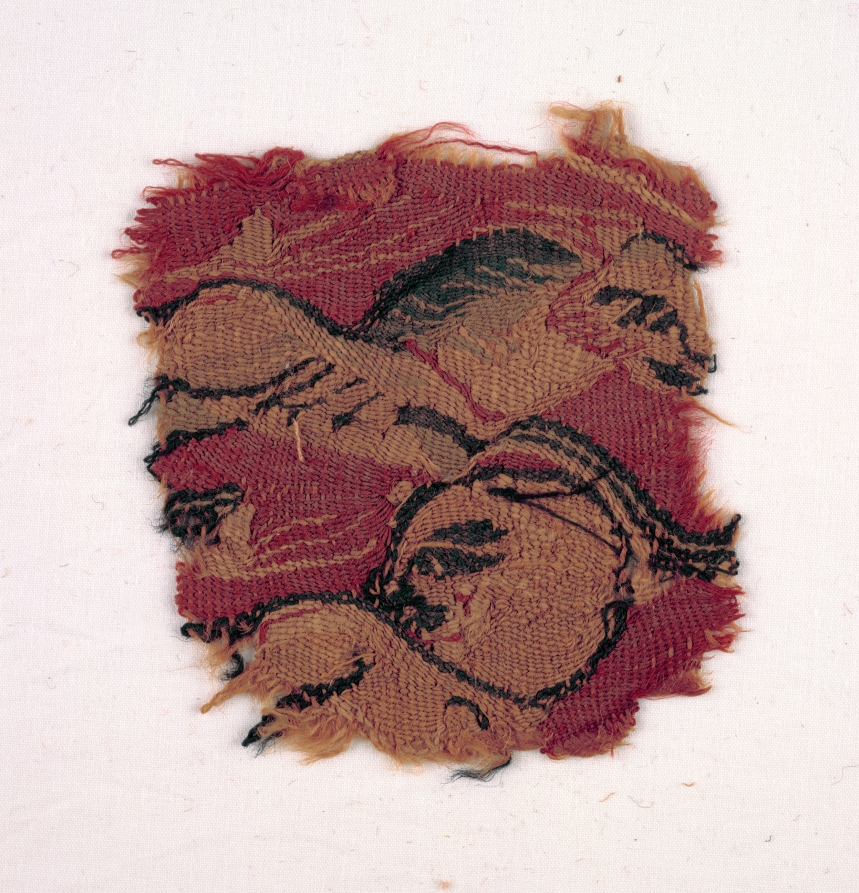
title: Fragment with Two Animals (?)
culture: Egypt, Byzantine period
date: 580 – 599 (?)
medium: tapestry weave: wool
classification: Textile